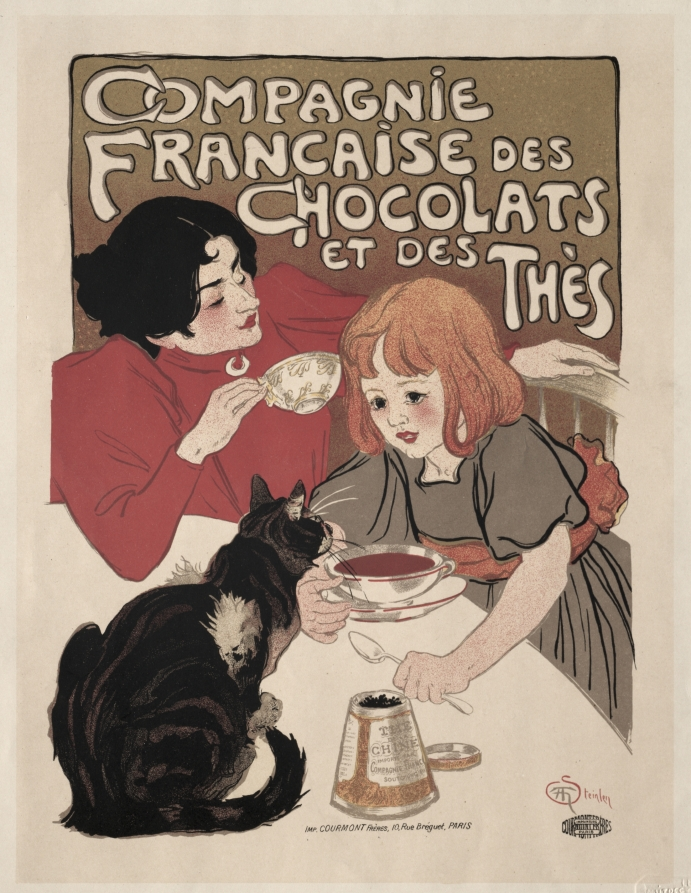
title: Compagnie Française des Chocolate et des Thés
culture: Switzerland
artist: Théophile Alexandre Steinlen (Swiss, 1859–1923)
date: 1895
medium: lithograph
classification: Print